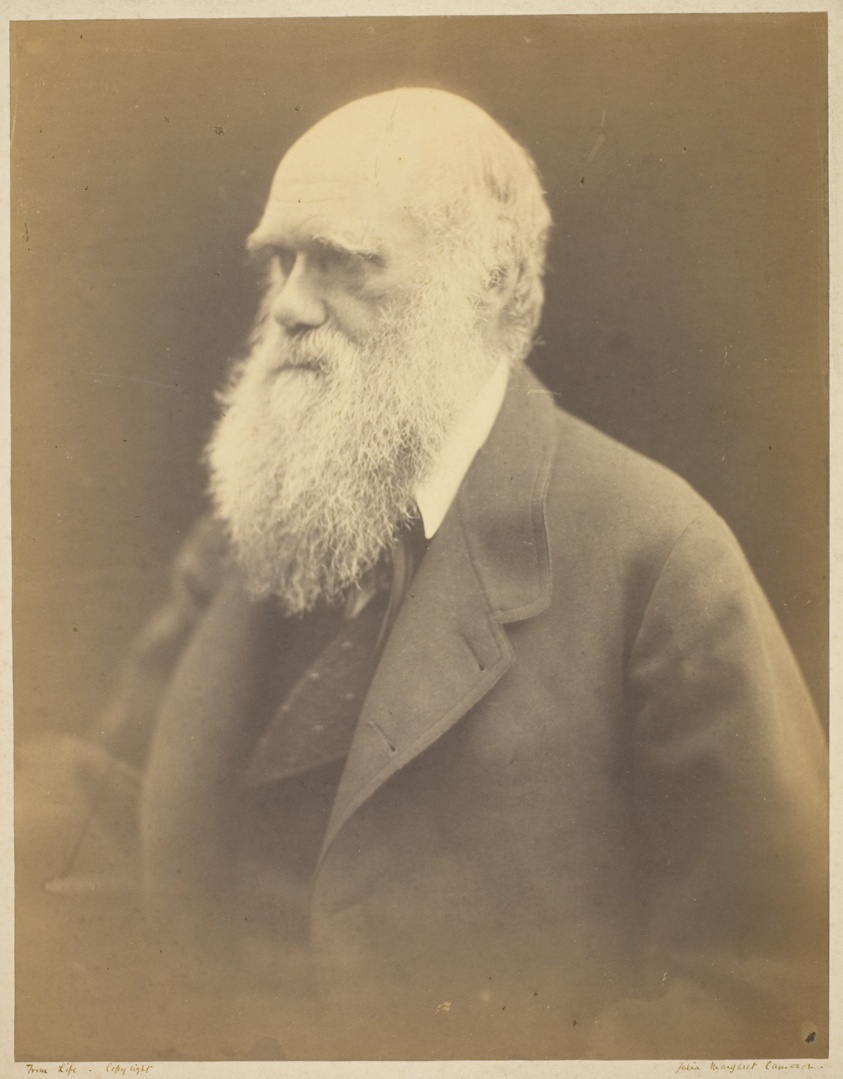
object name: Photograph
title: Charles Darwin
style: 19th century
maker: Julia Margaret Cameron (English, 1815–1879)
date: 1868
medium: Albumen print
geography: England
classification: albumen silver print; photographic process; photography; photograph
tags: portraits, portraits: male subject, photography